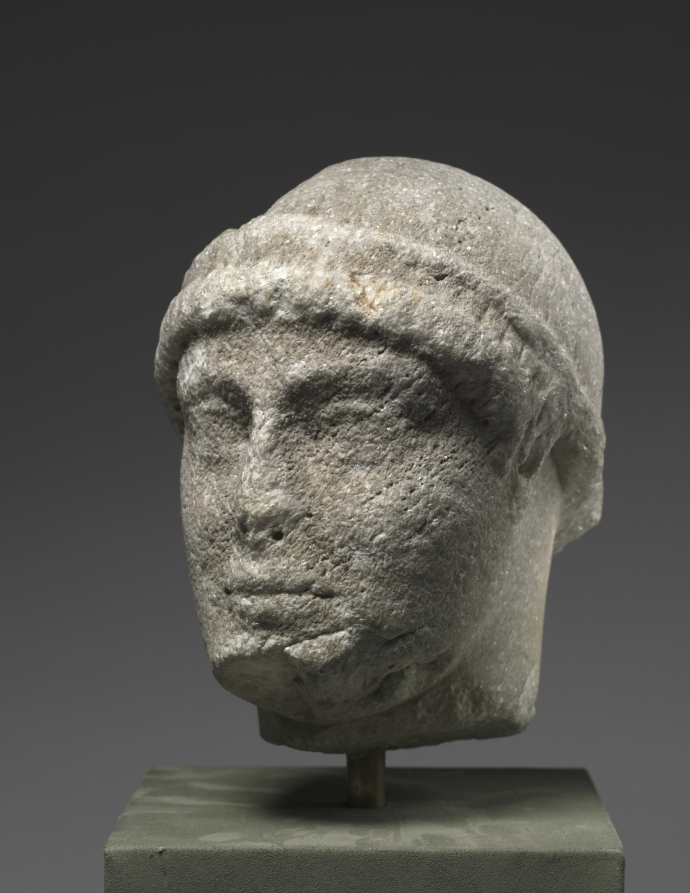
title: Head of Youth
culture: Sicily(?), Greek, Severe period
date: c. 470 BCE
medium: marble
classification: Sculpture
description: Although the face is now badly broken and quite weathered, this head was originally of high-quality workmanship, as can be seen in the extremely fine carving of the wavy hair preserved at the top and back. The slight asymmetry of the neck and facial features suggest that the head, which likely belonged to a full-bodied sculpture just under life-size, turned gently to one side.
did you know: The Severe style, named for its sober simplicity, marks the beginning of the Greek Classical period, c. 480–450 BC.